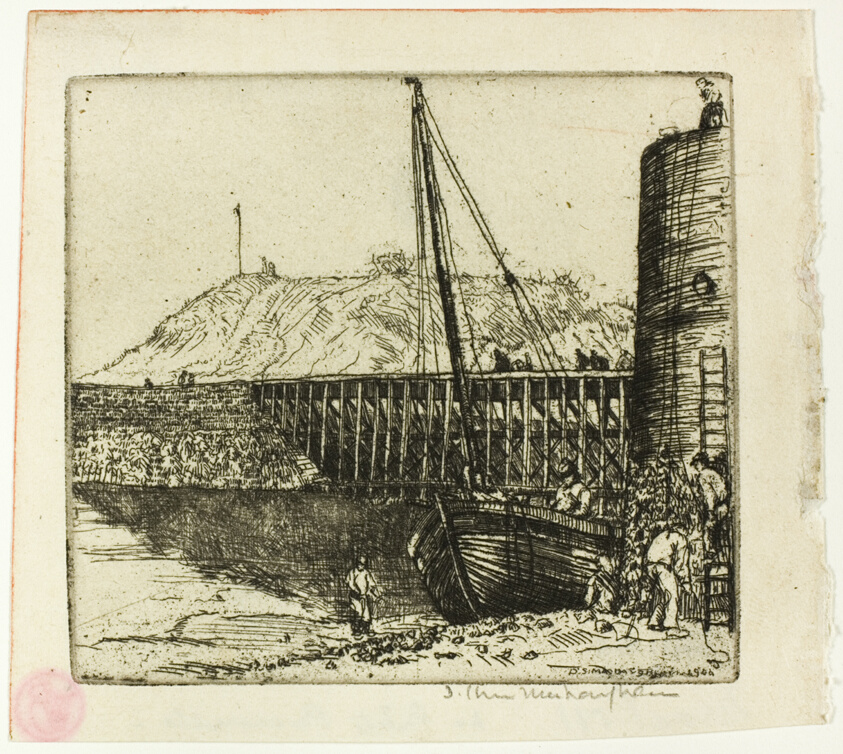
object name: Print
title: La Passerelle, Boulogne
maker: Donald Shaw MacLaughlan (American, born Canada, 1876-1938)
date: 1902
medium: Etching in black on cream wove paper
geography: United States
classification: etching; print; prints and drawing